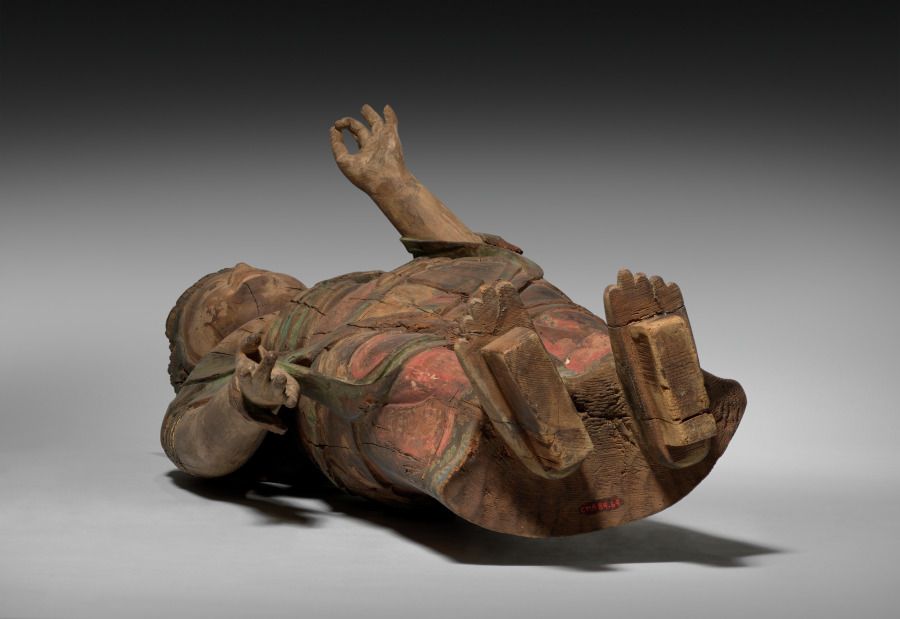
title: Standing Shokannon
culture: Japan, Heian period (794–1185)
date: 900s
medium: carved (single-block) wood with polychromy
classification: Sculpture